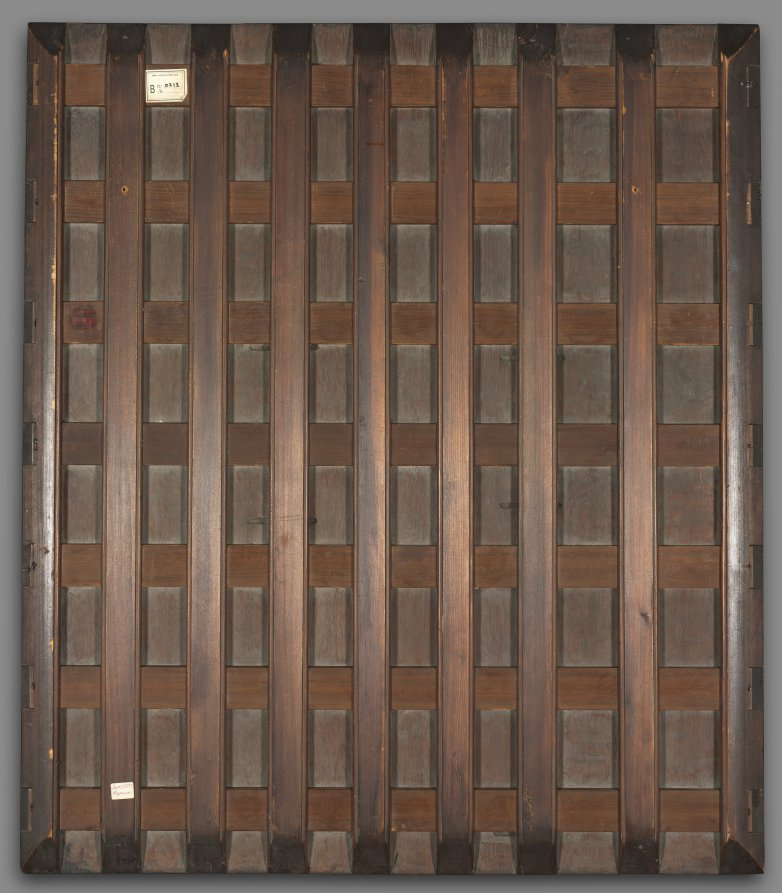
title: Portrait of Machtelt Suijs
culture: Flanders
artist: Maerten van Heemskerck (Dutch, 1498–1574)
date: c. 1540–45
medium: oil on wood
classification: Painting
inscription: note on cradle appears on a notation in chalk (originally) slightly scratched faintly letters " Mr A.M.C [?] or K [?] Reyve"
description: Maerten van Heemskerck lived in Rome for four years (1532–36) and was deeply affected by the city's art and antiquities. Here, the half-length, seated figure, the tense yet elegant hands, and even the grotesque classical mask reflect the impact of that experience, while the love of meticulously represented textures is traditionally associated with northern European art. Machtelt Suijs married Dirick van Teijlingen in 1535 and lived in Alkmaar (the Netherlands), where Heemskerck must have painted her. The coat-of-arms that hangs from the mask combines family emblems, indicating that her portrait must have been accompanied by one (now lost) of her husband.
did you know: The coat of arms depicts golden pile drivers, indicating the family construction business.